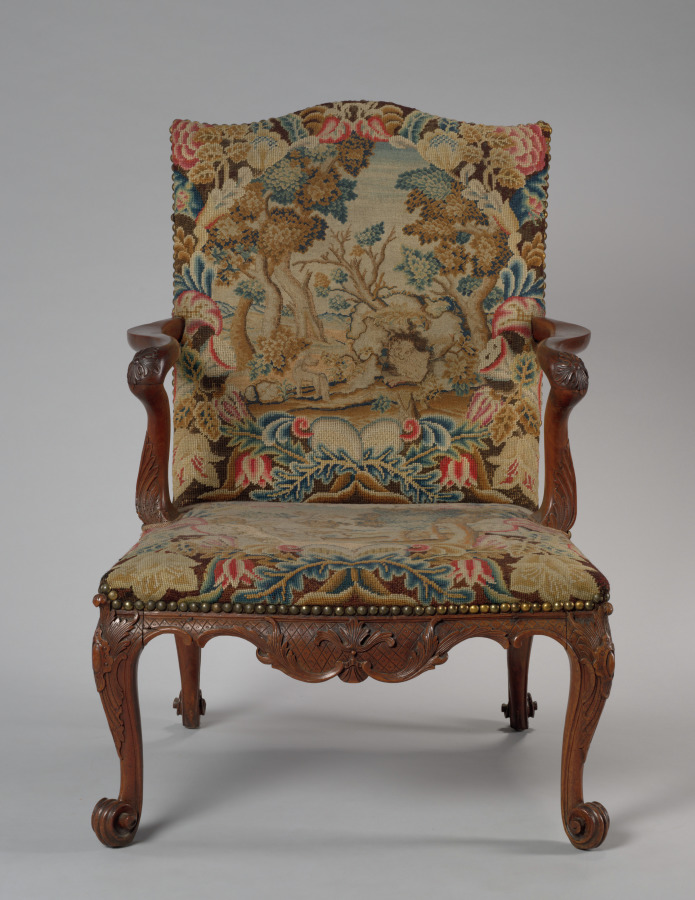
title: Armchair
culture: England, 18th century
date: 1760–1765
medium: mahogany upholstered in needlework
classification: Furniture and woodwork